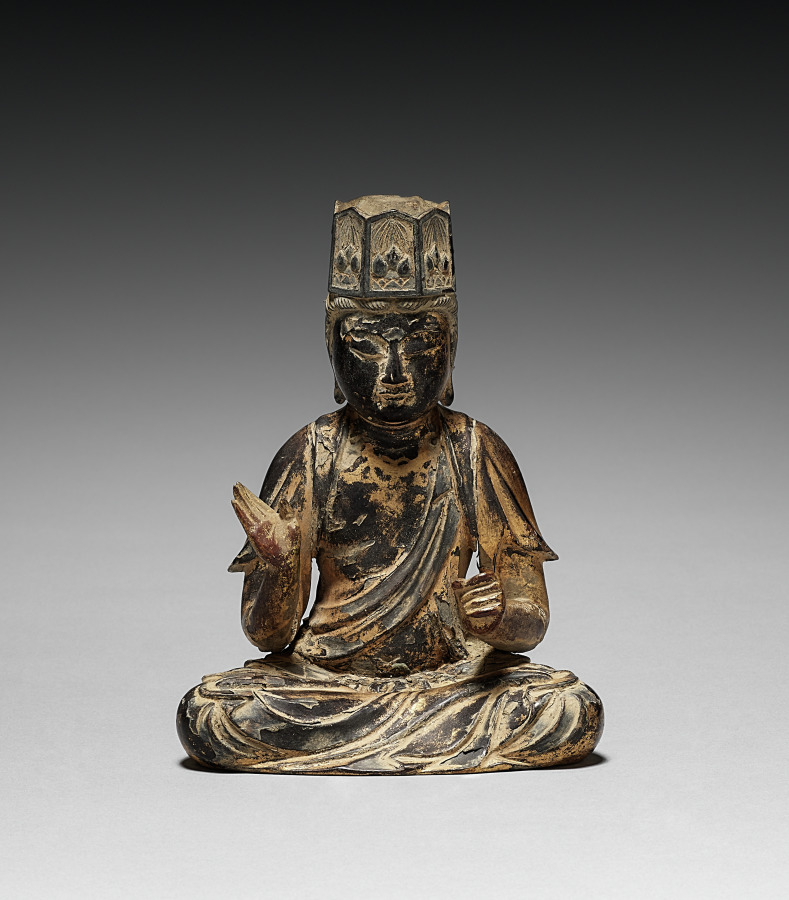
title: Bodhisattva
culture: Japan, Heian period (794–1185)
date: 900s-1100s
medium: gilded wood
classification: Sculpture